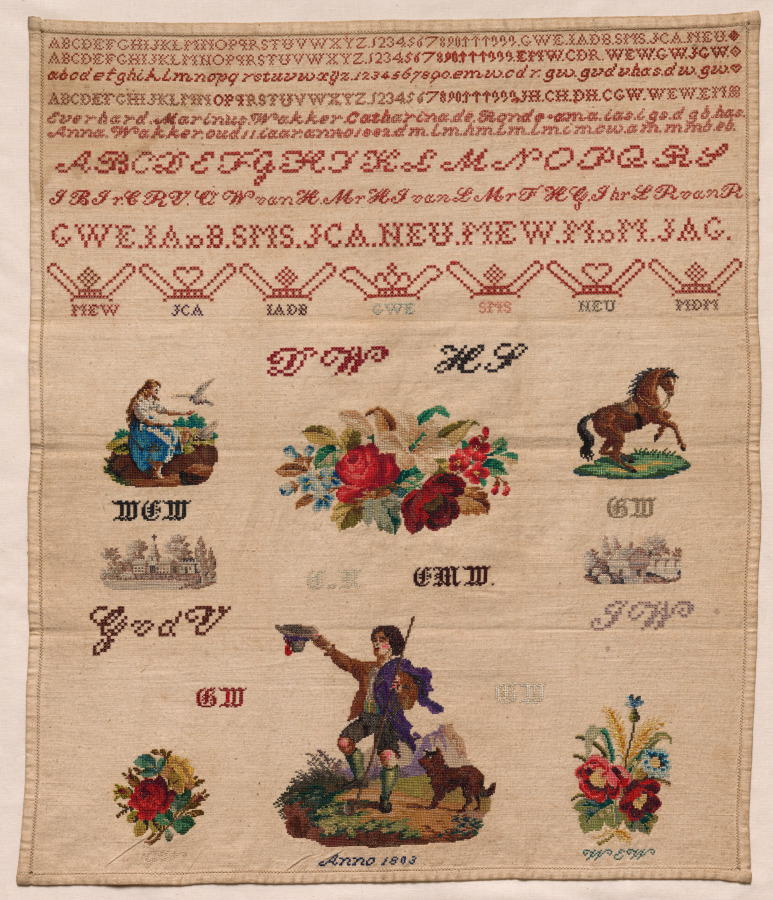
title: Sampler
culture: Netherlands, late 19th century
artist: Anna Wakker (Dutch, 1871–1917)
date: 1882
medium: embroidery; silk on cotton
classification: Sampler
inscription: rows of alphabets, numerals, initials, names ("Everhard Marinus Wakker and Catharina Ronde"), and inscription: "Anna Wakker oud 11 iaar anno 1882." In center, at bottom: "Anno 1803" (embroidered later).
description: Orphaned as a child, Anna was sent to Burgerweeshuis (Citizen's Orphange) where she created this sampler. She embroidered not only her own name, Anna Wakker, but also the names of her parents, Everhard Marinus Wakker and Catharina Ronde.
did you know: The orphans often embroidered the initials of relatives on their samplers.